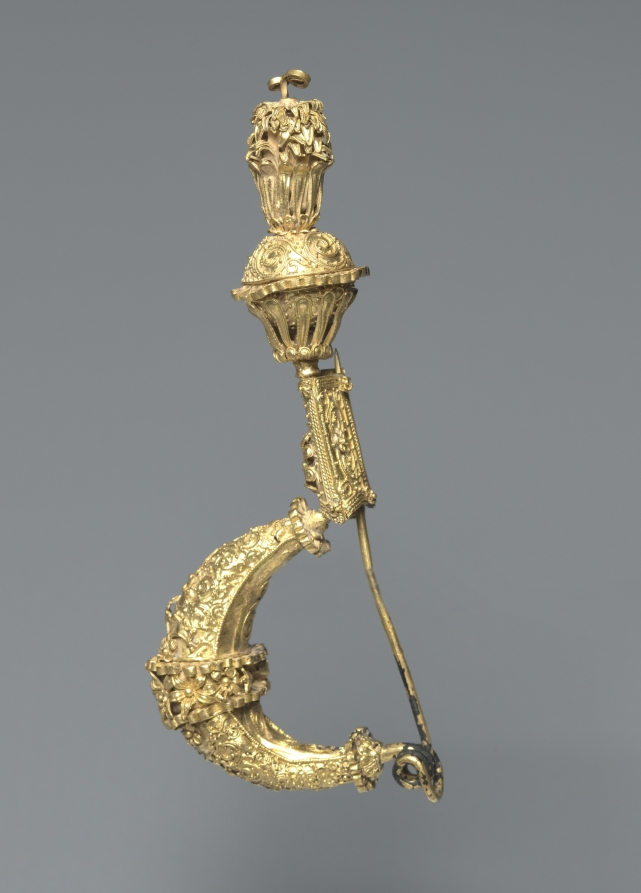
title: Fibula (Pin)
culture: Etruscan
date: 300s BCE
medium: gold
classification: Jewelry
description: This gold fibula consists of a leech-shaped bow attached to a pin, a plaque, and a biconical bead. A nine-petaled flower tops the bead. The fibula was likely used to fasten clothes by gathering fabric together. Unlike silver and bronze, gold does not easily tarnish.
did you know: This fibula was cast in three parts, the bow and pin, plaque, and bead, using the lost wax method.